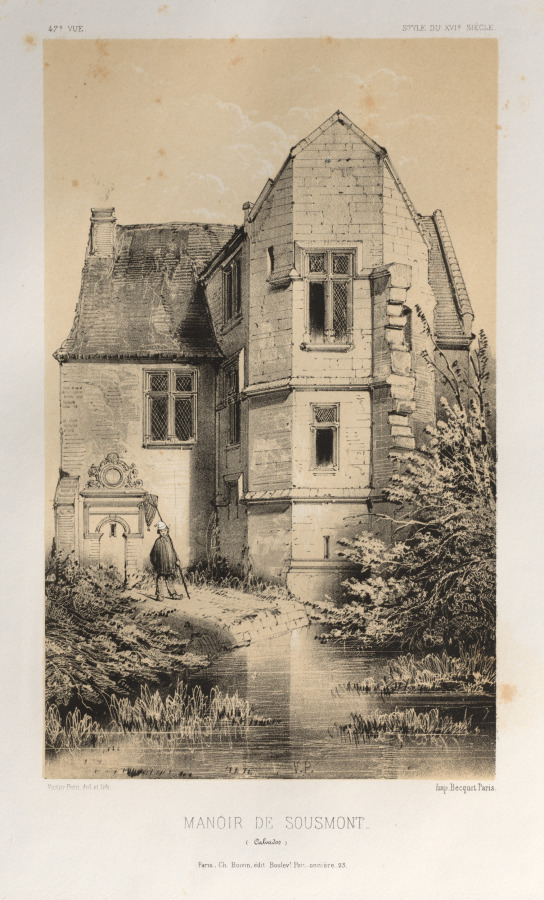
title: Architecture Pittoresque ou Monuments des XVeme. Et XVIeme. Siecles: Chateaux de France des XV et XVI Siecles: Pl. 47, Manoir De Sousmont (Calvados)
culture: France, 19th century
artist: Victor Petit (French, 1817–1874)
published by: Charles Boivin (publisher and editor); Lith de Godard a Paris (printer)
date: 1860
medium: lithograph with tint stone, from portfolio of 100 lithographs with tint stone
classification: Print